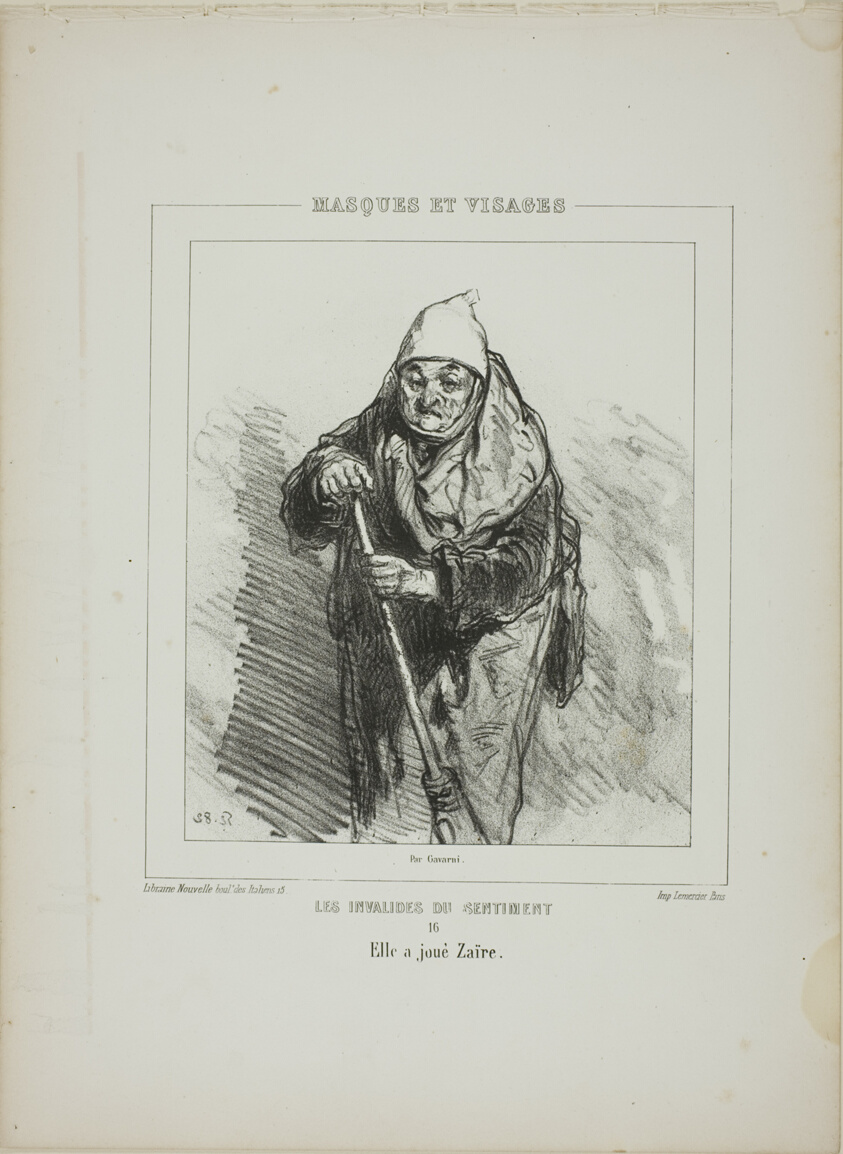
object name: Print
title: Les Invalides du Sentiment: Elle a joué Zaïre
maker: Paul Gavarni (French, 1804-1866)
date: 1853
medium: Lithograph in black on cream wove paper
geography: France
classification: lithograph; print; prints and drawing